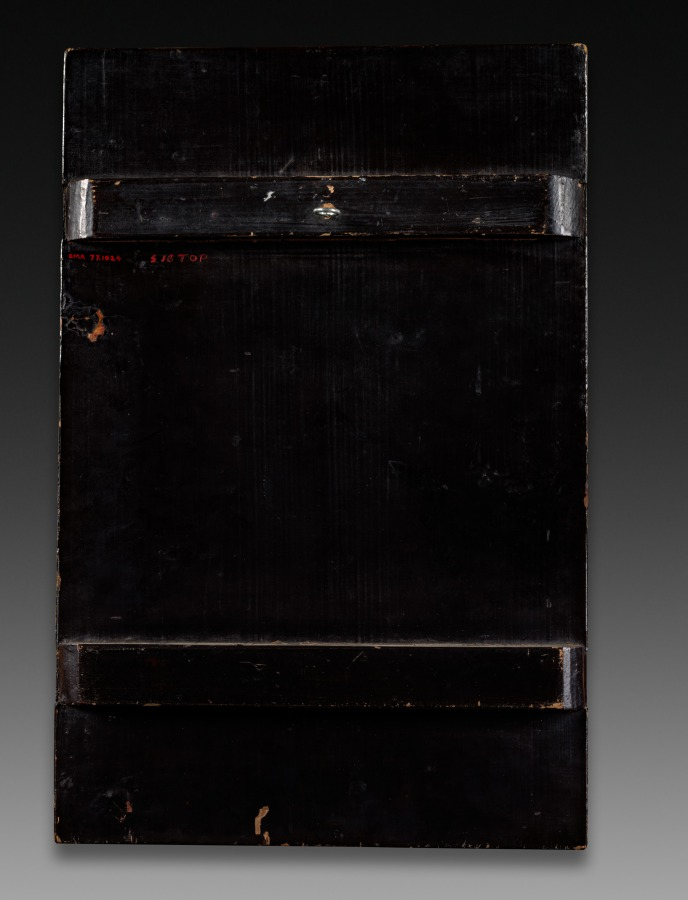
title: Decorative Panel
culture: Japan, Edo period (1615–1868) to Meiji period (1868–1912)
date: 1800s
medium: lacquer, ivory, shell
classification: Lacquer